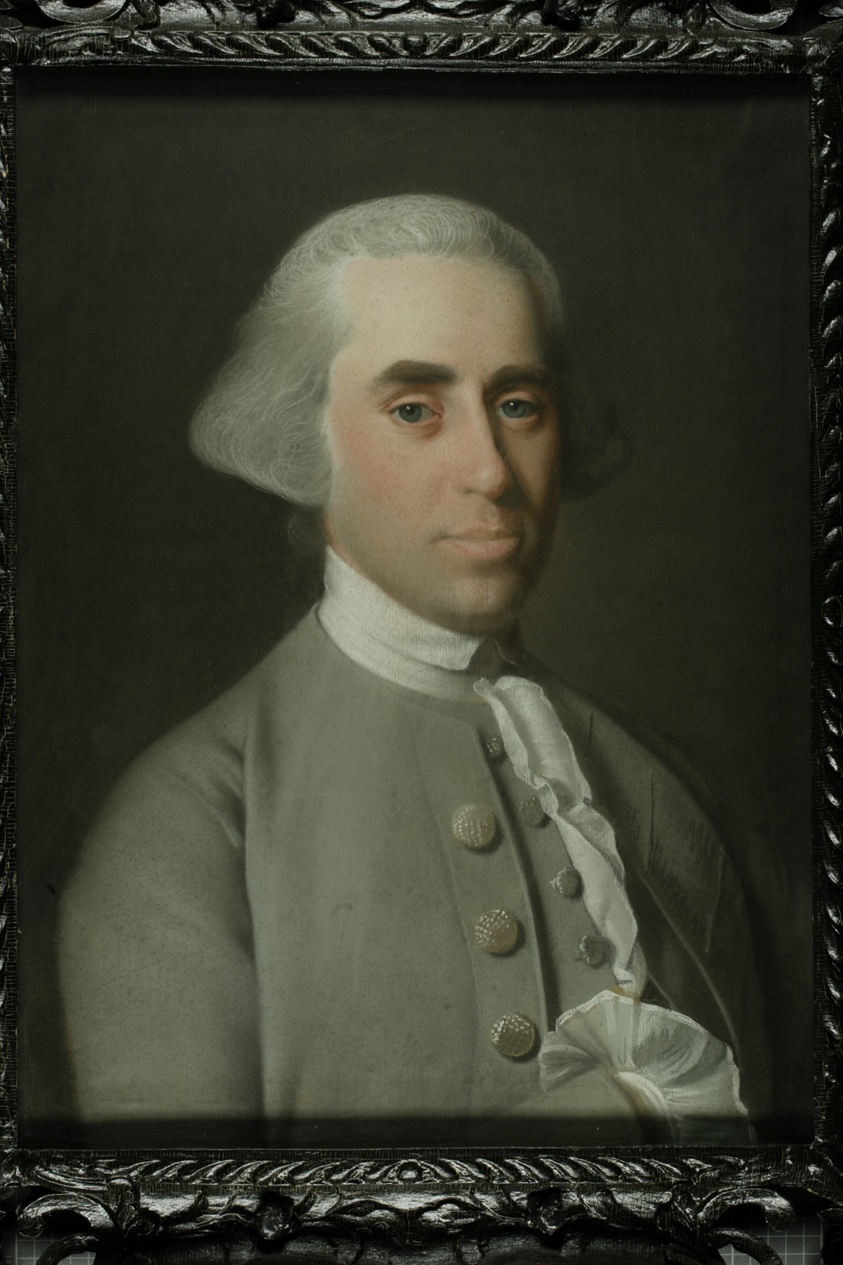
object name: Drawing and Watercolor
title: Henry Hill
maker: John Singleton Copley (American, 1738–1815)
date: c. 1765–70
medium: Pastel on brown paper laid down on canvas, linen, or board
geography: United States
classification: pastel; painting